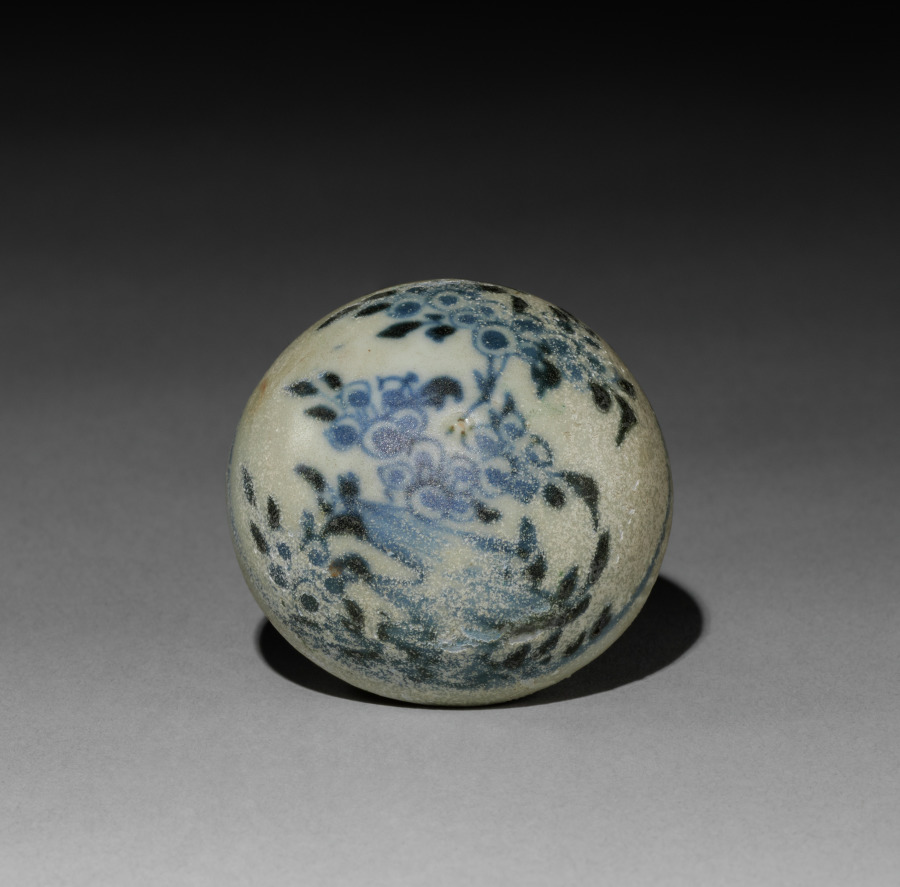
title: Pill Box (lid)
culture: China, Qing dynasty (1644-1911)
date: c. 1752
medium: porcelain with blue and white decoration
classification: Ceramic